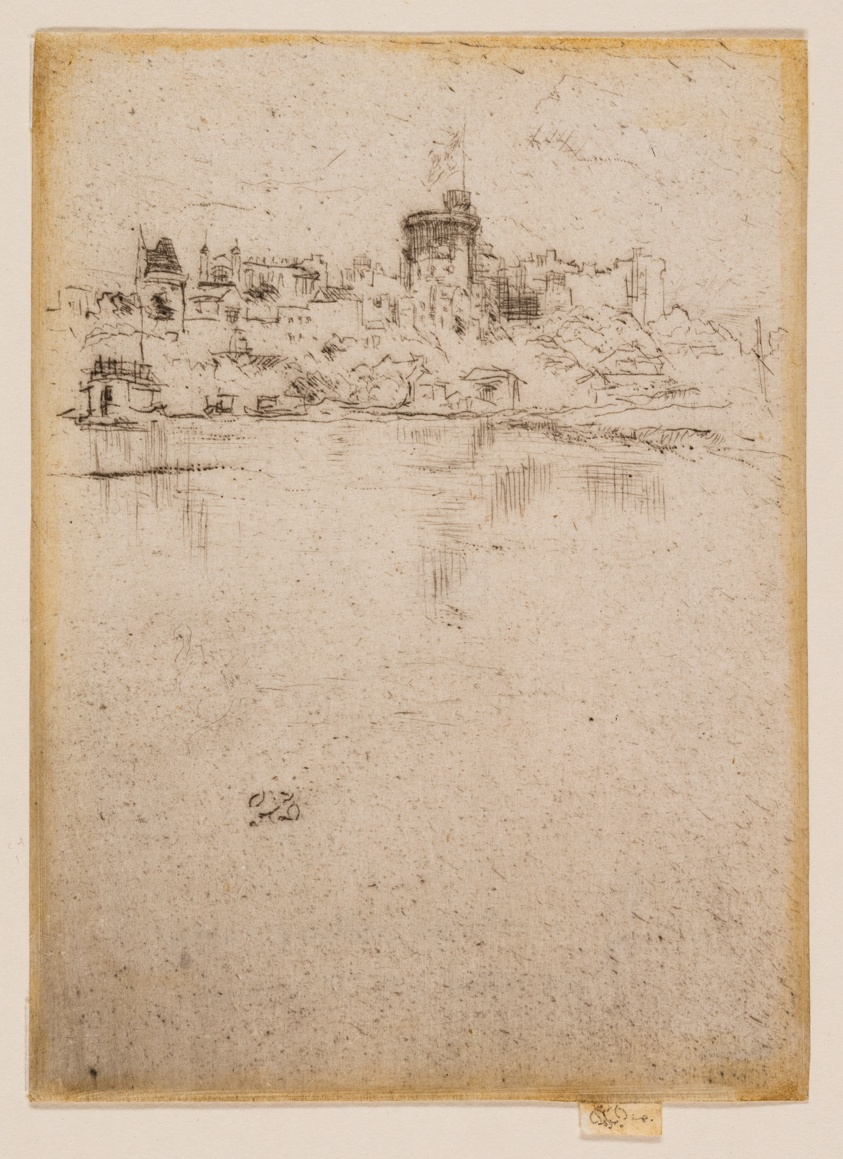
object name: Print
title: Windsor (Memorial)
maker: James McNeill Whistler (American, 1834-1903)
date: 1887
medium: Drypoint with foul biting in black ink on ivory laid paper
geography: United States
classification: drypoint; foul biting; print; prints and drawing; paper